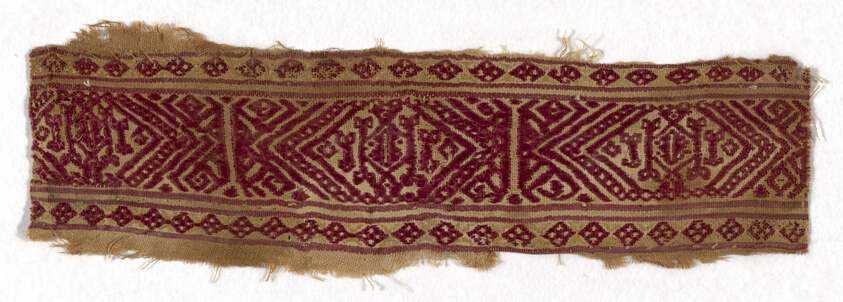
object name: Textile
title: Border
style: mamluk, ayyubid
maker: Egypt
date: Ayyubid period (1171–1250)/Mamluk period (1250–1517), 13/14th century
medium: silk and linen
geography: Egypt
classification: textile; needlework (visual works)